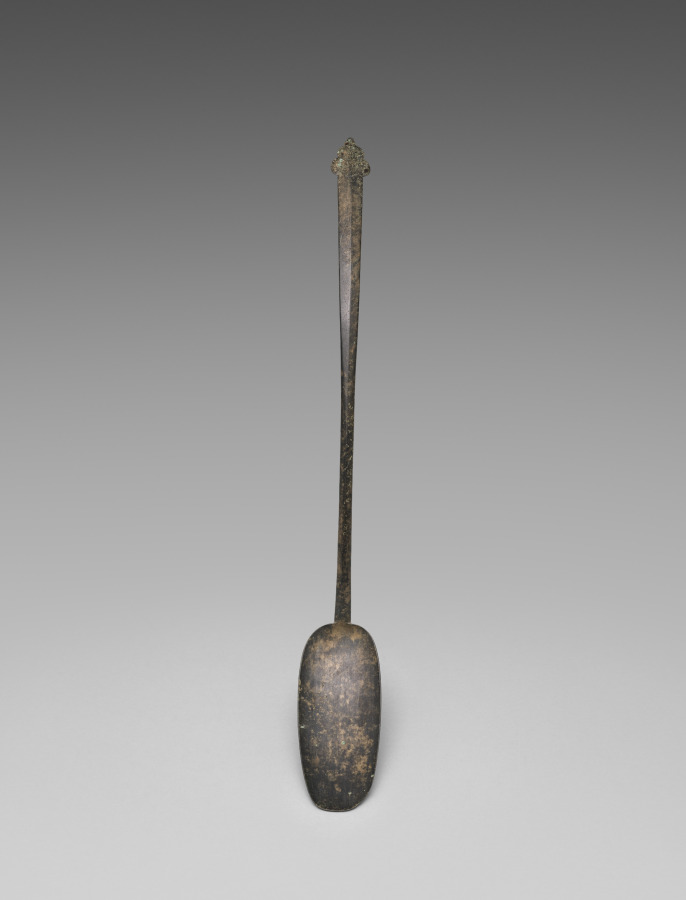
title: Spoon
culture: Korea, Goryeo dynasty (918–1392)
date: 918–1392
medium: silver bronze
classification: Metalwork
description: Celadons, spoons, seals, and bronze mirrors were among the most common burial objects of the Goryeo dynasty (918–1392), placed in tombs to honor and comfort the deceased. This spoon, with its gracefully curved bowl and handle that bends downward to each side, ending in a scepter-shaped finial, is distinctive in design and was likely used in Buddhist rituals, rather than as an everyday utensil.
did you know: Scholars have proposed that toward the end of the 1300s, Koreans enjoyed meat-based soups more than any other dishes, explaining why spoons became common household items as well as burial goods.